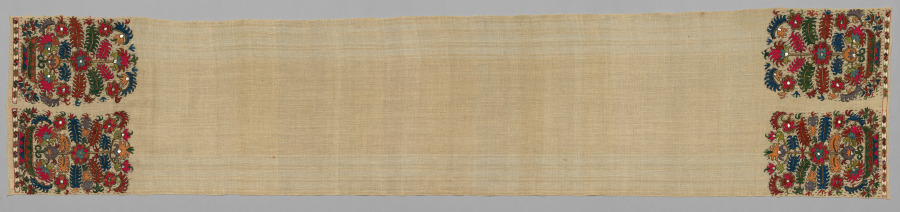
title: Towel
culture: Greece, Sporades Islands, Skyros, 18th century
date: 1700s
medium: embroidery in silk, gold and silver threads on natural linen ground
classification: Embroidery